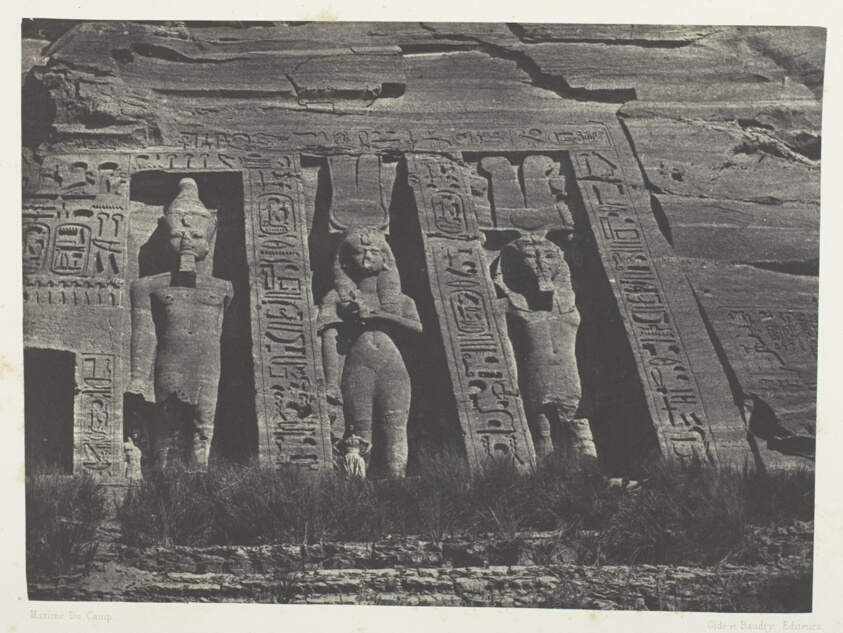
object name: Photograph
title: Ibsamboul, Partie Septentrionale Du Spéos D'Hathor; Nubie, plate 108 from the album "Egypte, Nubie, Palestine et Syrie" (1852)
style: 19th century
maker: Maxime Du Camp (French, 1822–1894)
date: 1849/51, printed 1852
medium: Salted paper print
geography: France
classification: salted paper print; photographic process; photography; photograph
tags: Collected by Hugh Edwards, Egypte, Nubie, Palestine et Syrie